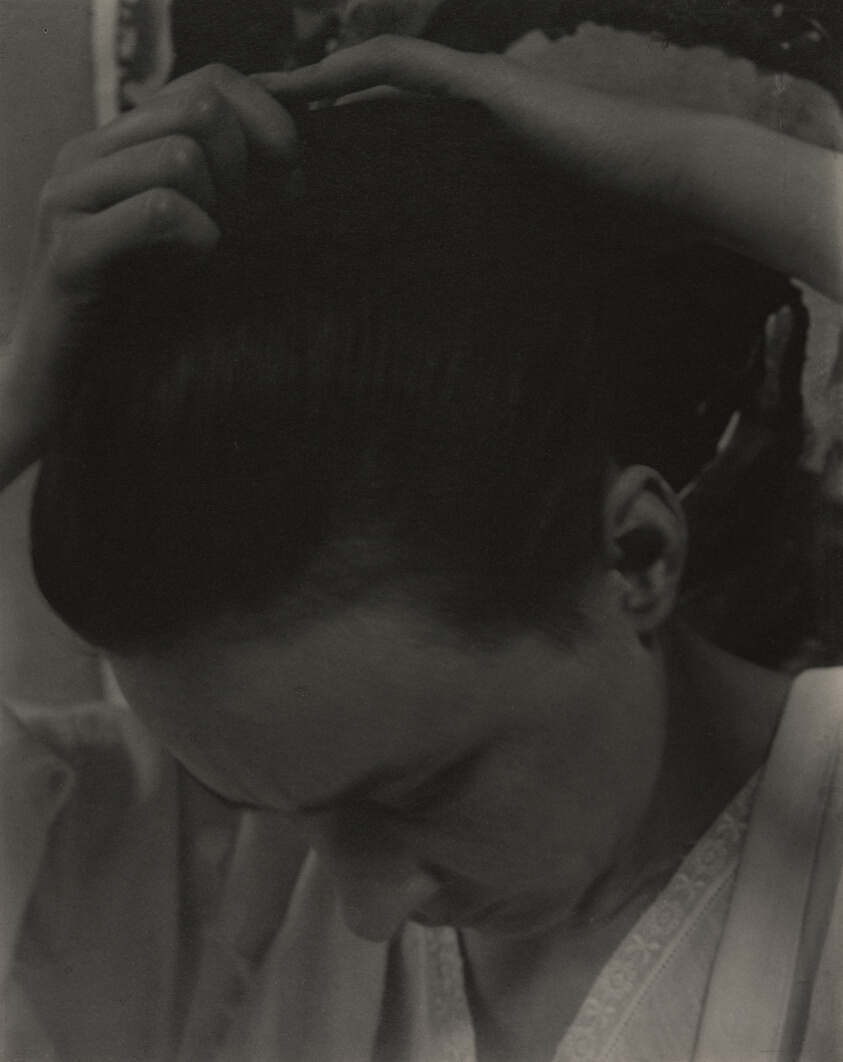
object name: Photograph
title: Georgia O'Keeffe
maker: Alfred Stieglitz (American, 1864–1946)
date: 1919/21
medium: Platinum print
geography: United States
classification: platinum print; photographic process; photography; photograph